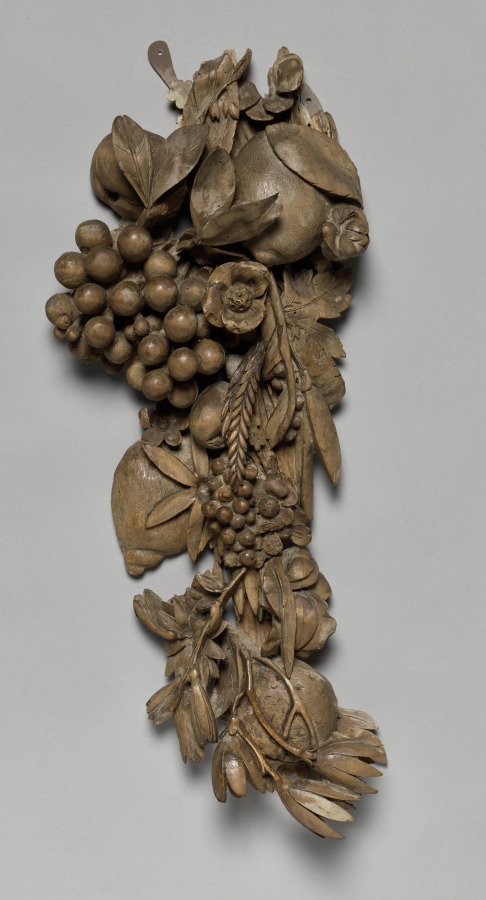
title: Carving from an Overmantel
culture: England, 17th century (Charles II)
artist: Grinling Gibbons (British, 1648–1721)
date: c. 1675–1677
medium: lindenwood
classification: Sculpture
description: The arrangement of architectural elements within grand interior spaces in the late 1600s and early 1700s emphasized symmetry and height. Decorative elements such as elaborately carved mantels, mirrors, paintings, and applied wall decorations were often stacked to achieve a visual focal point at one or both ends of the room. This particular overmantel decoration once hung above the fireplace in the Green Drawing Room of the Earl of Essex at Cassiobury in Watford, near London. In 1823, the British painter William Henry Hunt (1790–1864) produced a watercolor of the drawing room which featured this overmantel decoration. Grinling Gibbons was born in Rotterdam, the Netherlands, of English parents. After training there as an artist, he came to England in the 1660s and soon began to work as a sculptor of interior ornament, particularly in wood. One of his first large-scale decorative projects was the series of interiors at Cassiobury House.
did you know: The swags of fruit and foliage featured in this wooden overmantel decoration evoke the bounty of the English countryside.